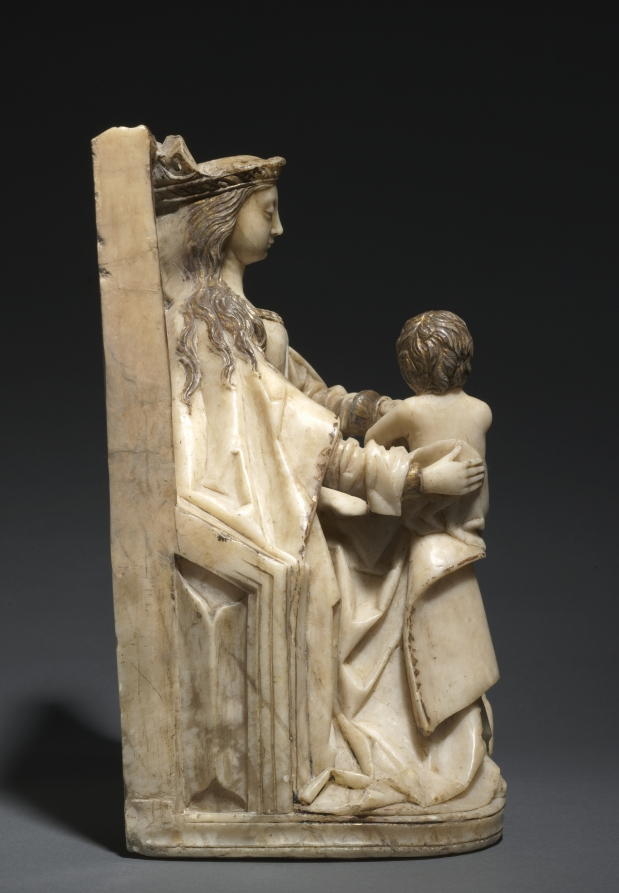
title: Enthroned Virgin and Child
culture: Spain, Burgos, 15th century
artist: Gil de Siloé (Spanish, active c. 1475–1505)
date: c. 1480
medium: alabaster with traces of gilding and polychromy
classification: Sculpture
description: The seated Virgin Mary with Christ is one of the most popular themes in Christian art of the Middle Ages. Alabaster was an ideal material to depict the fleshiness of Jesus, the lush folds of Mary’s cloak, and the fine details of the throne and gown. Christ is reaching for something in his mother’s hand that is now unrecognizable because alabaster tends to break or wear away quickly. It may have been a book or a piece of fruit. Given its small size, it is likely that this sculpture was intended for private use.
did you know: This sculpture was possibly made for Queen Isabella, the Spanish ruler who sponsored Christopher Columbus.